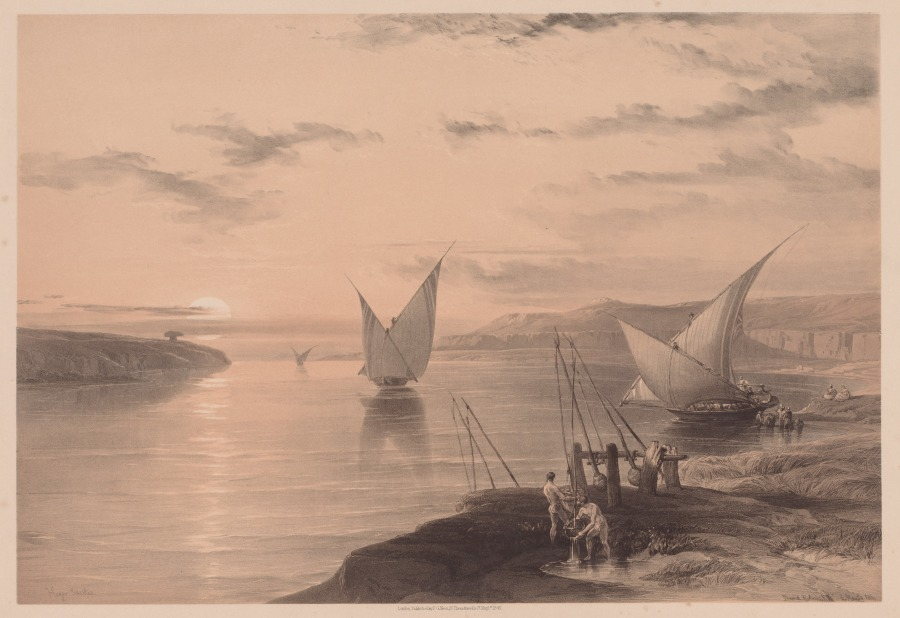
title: Egypt and Nubia: Volume I - No. 12, Hadjar Silsilis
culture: England, 19th century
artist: Louis Haghe (British, 1806–1885)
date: 1838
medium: color lithograph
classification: Print